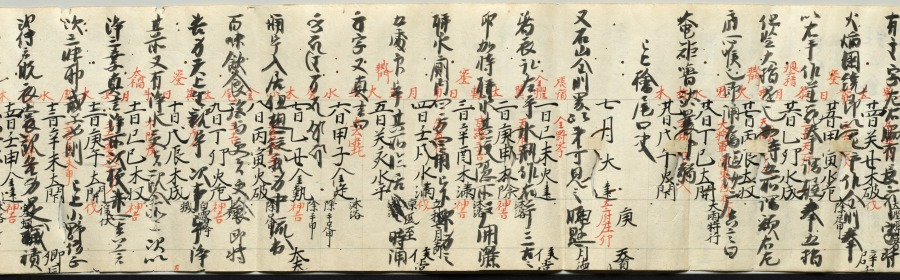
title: Scroll of Miscellaneous Notes written on a Calendar by Priest Seigen (verso)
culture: Japan, Kamakura period (1185–1333)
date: c. 1200–1231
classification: Manuscript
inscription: bears miscellaneous notes written by Priest Seigen.